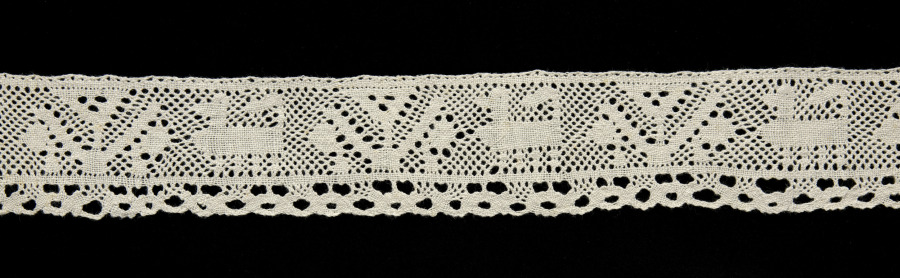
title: Lace Edging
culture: Italy, Abruzzi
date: 1700s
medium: Cotton: bobbin lace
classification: Lace